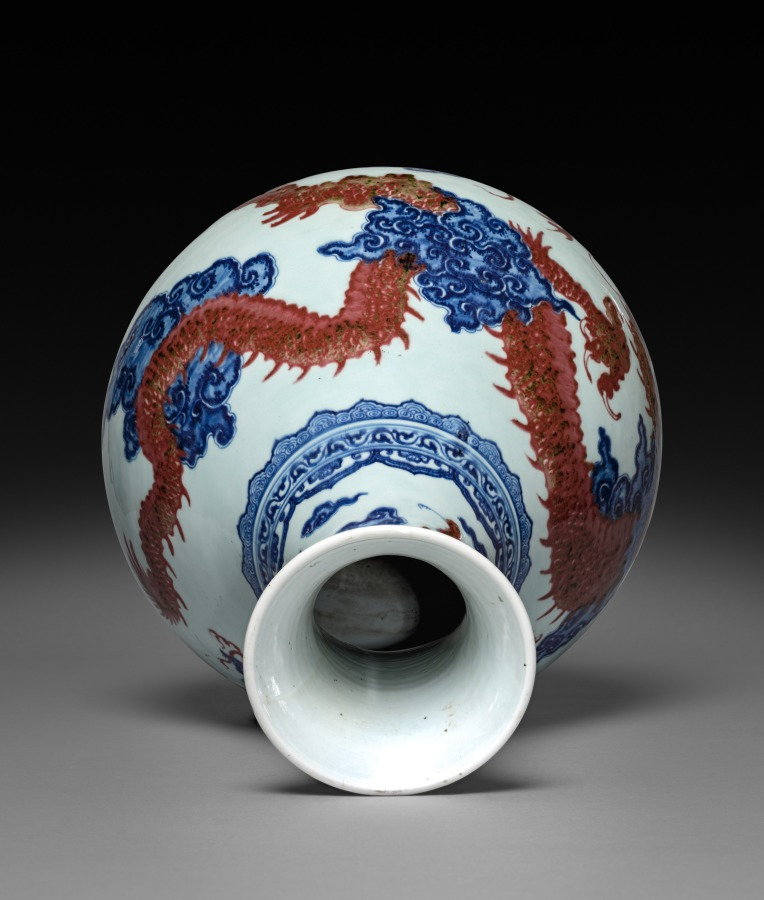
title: Vase with Dragon and Cloud Decoration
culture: China, Qing dynasty (1644-1911), Yongzheng reign (1723-35)–Qianlong reign (1736-95)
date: mid- to late 1700s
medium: porcelain with underglaze blue and red decoration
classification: Ceramic